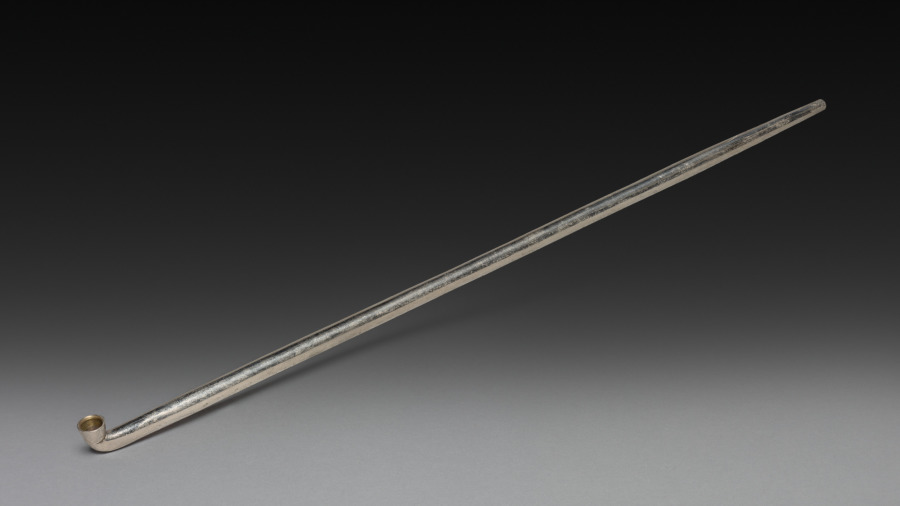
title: Tobacco Pipe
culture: Japan, Edo period (1615–1868) to Meiji period (1868–1912)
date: 1800s–early 1900s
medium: metal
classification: Miscellaneous